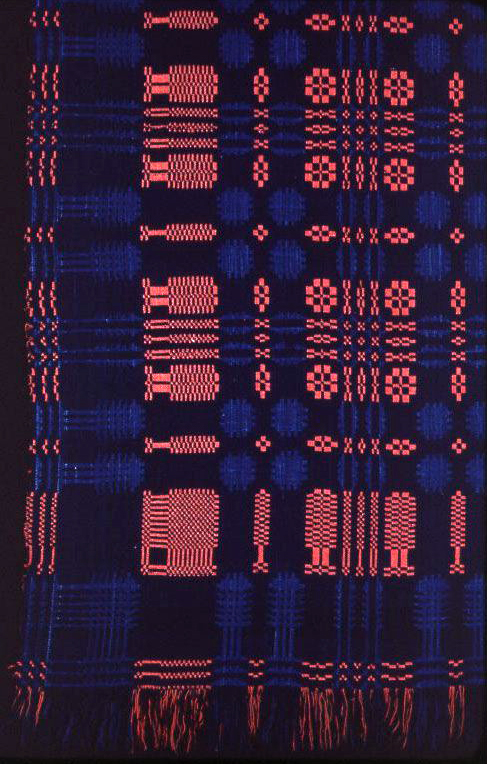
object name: Textile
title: Coverlet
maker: United States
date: 1825/35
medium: Cotton and wool, plain weave double cloth; two loom widths joined; fringed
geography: United States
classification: textile; weaving - coverlet; coverlet; weaving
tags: coverlet